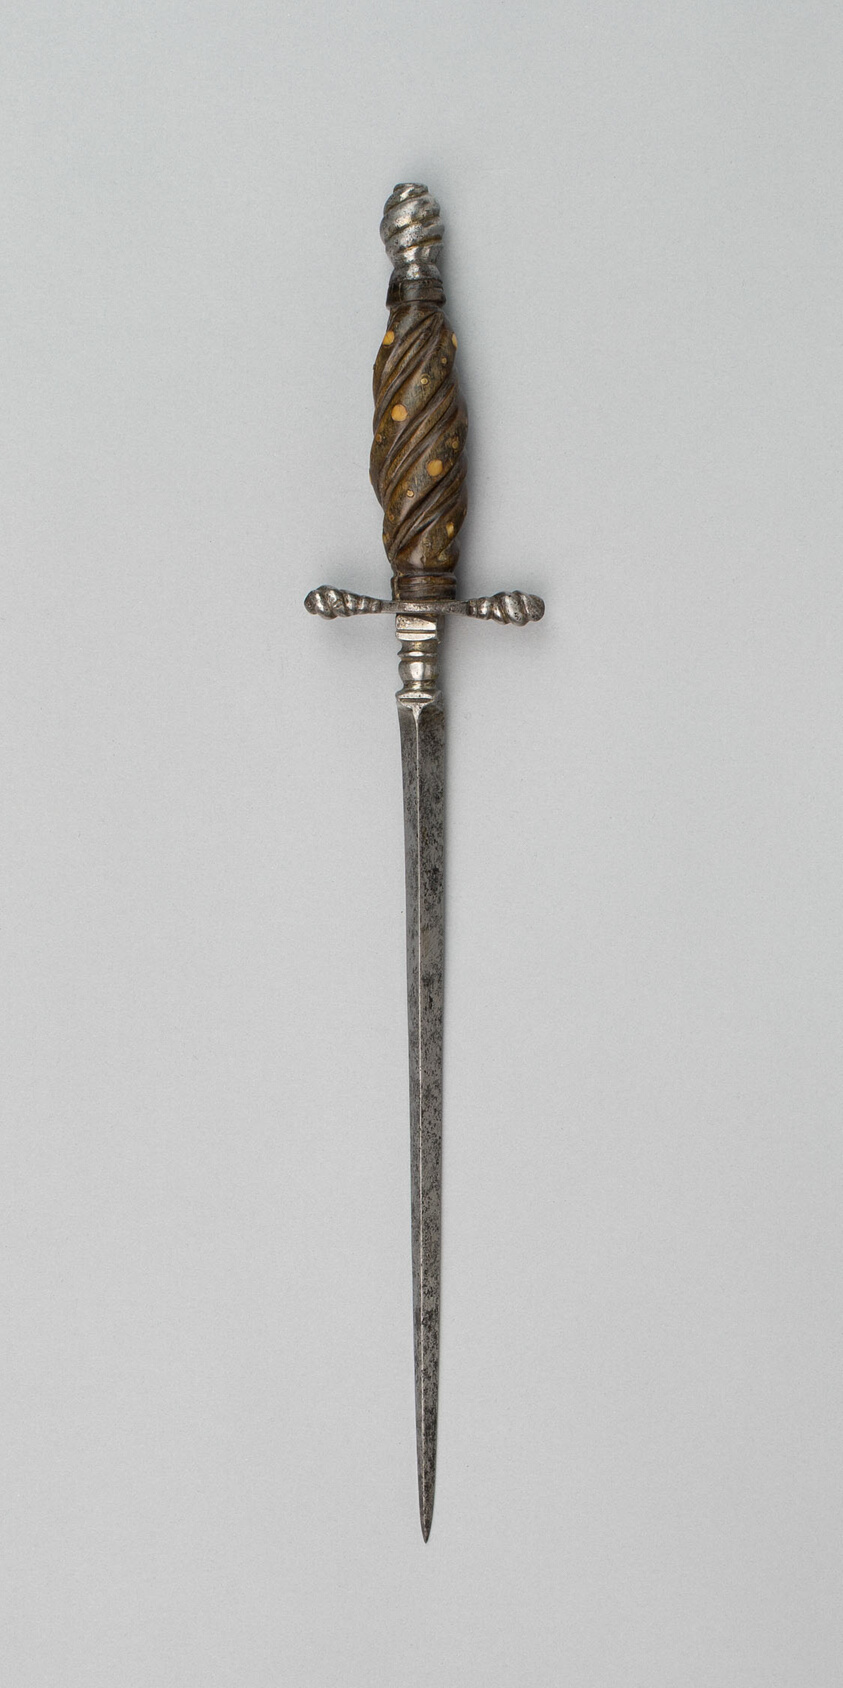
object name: Arms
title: Gunner's Stiletto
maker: Italian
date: 17th century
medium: Steel, iron, horn, and brass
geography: Italy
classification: edged weapon-dagger; arms; arms and armor